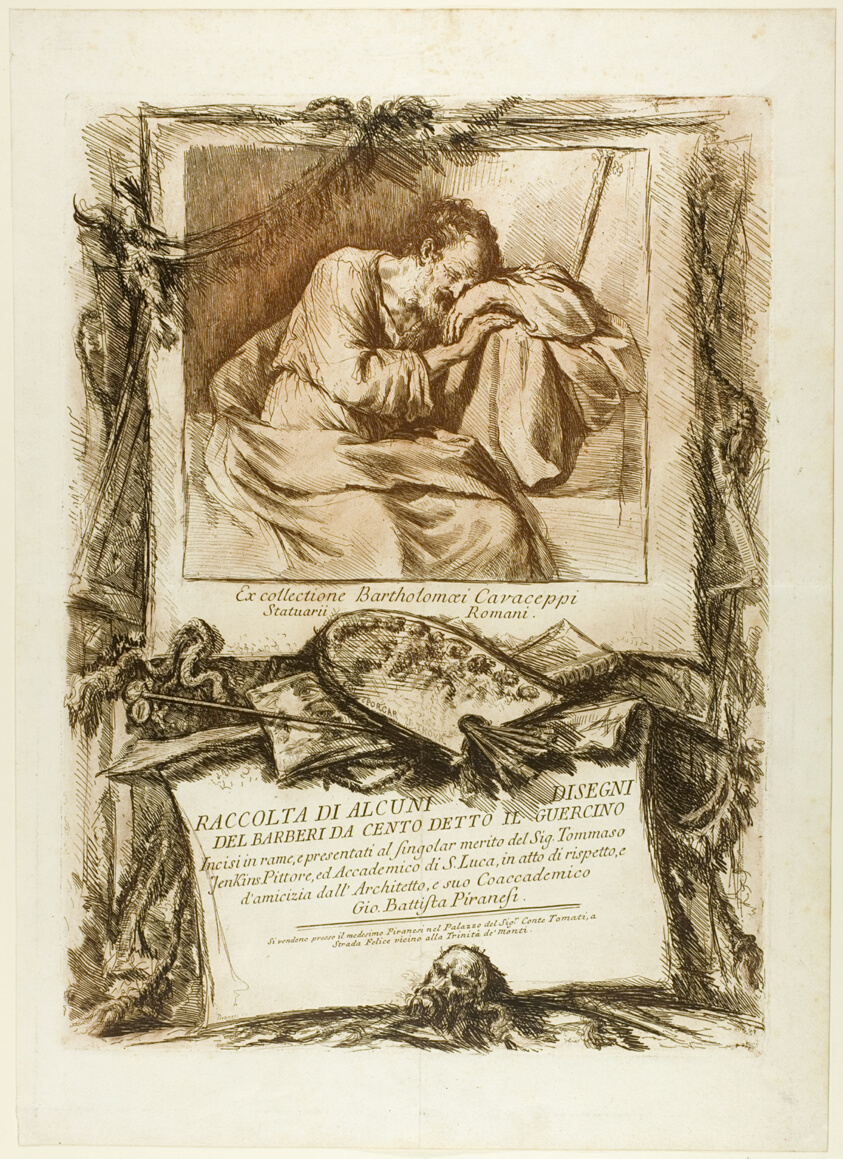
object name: Print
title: Title Page: Collection of several drawings engraved after Barbieri da Cento (known as Guercino) engraved on copper and presented to Thomas Jenkins, painter and member of the Academy of St. Luke, out of respect and friendship from his fellow member, the architect Gio. Battista Piranesi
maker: Giovanni Battista Piranesi (Italian, 1720-1778); after Giovanni Francesco Barbieri (Italian, 1591-1666)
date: 1764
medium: Etching in red and black ink on ivory laid paper with gilt edges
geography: Italy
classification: etching; print; prints and drawing